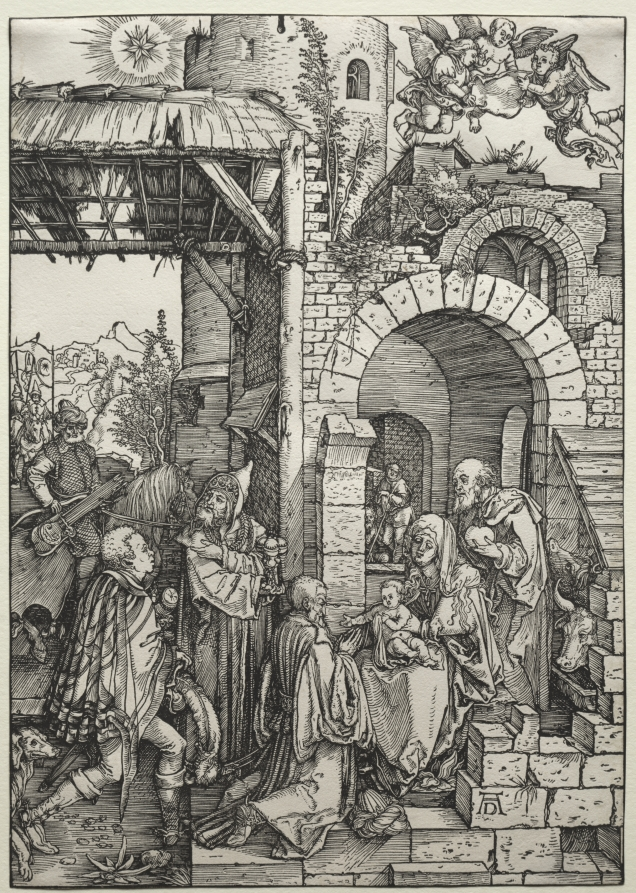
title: The Adoration of the Magi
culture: Germany, early 16th Century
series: The Life of the Virgin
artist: Albrecht Dürer (German, 1471–1528)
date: c. 1501–1503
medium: woodcut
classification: Print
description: These eight woodcuts (1959.99.8-15) progress from Gabriel’s announcement to Mary that she would bear the Son of God, to the events of her early motherhood and beyond. This included the joy of sharing her pregnancy with her cousin Elizabeth, Jesus’s birth, and the subsequent arrival of the magi. After Jesus’s circumcision and presentation at the temple the Holy Family fled to Egypt to avoid Herod and stayed there for several years. The seemingly out of place last scene shows a glimpse of their daily life in Egypt as Joseph continues his carpentry and Mary spins wool. The Holy Family is surrounded by angels and helpful putti and are blessed by God the Father and the Holy Spirit in the form of a dove overhead.